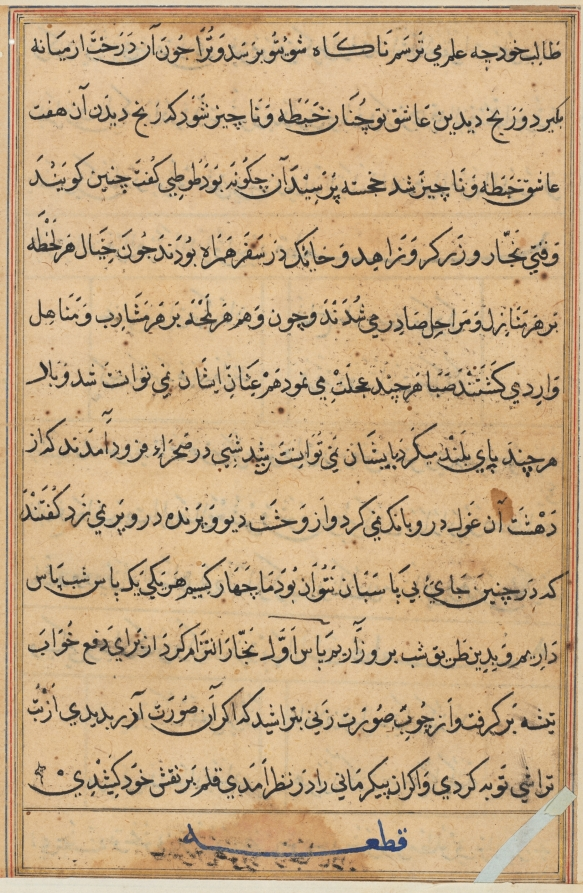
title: Page from Tales of a Parrot (Tuti-nama): text page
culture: Mughal India, court of Akbar (reigned 1556–1605)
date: c. 1560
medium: gum tempera, ink, and gold on paper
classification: Painting